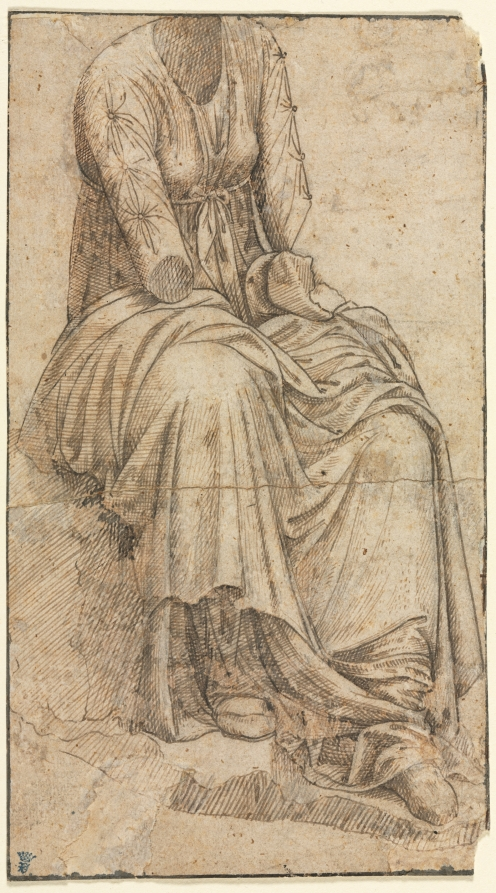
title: Copy of a Roman Statue of a Seated Woman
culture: Italy, 15th century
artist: circle of Domenico Ghirlandaio (Italian, 1449–1494)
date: c. 1450–94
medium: pen and brown ink (two different colors) with graphite; framing lines in pen and brown ink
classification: Drawing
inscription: Upper right, in red crayon: 5°°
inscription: unidentified collector's mark, lower left, in blue ink.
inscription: recto of secondary support, in top half, in brown ink: [illegible, visible in transmitted light]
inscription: verso of secondary support, upper center, in red crayon: A 37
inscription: upper center, in graphite: Donatello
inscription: upper center, in red crayon: [Donatello?] [erased]